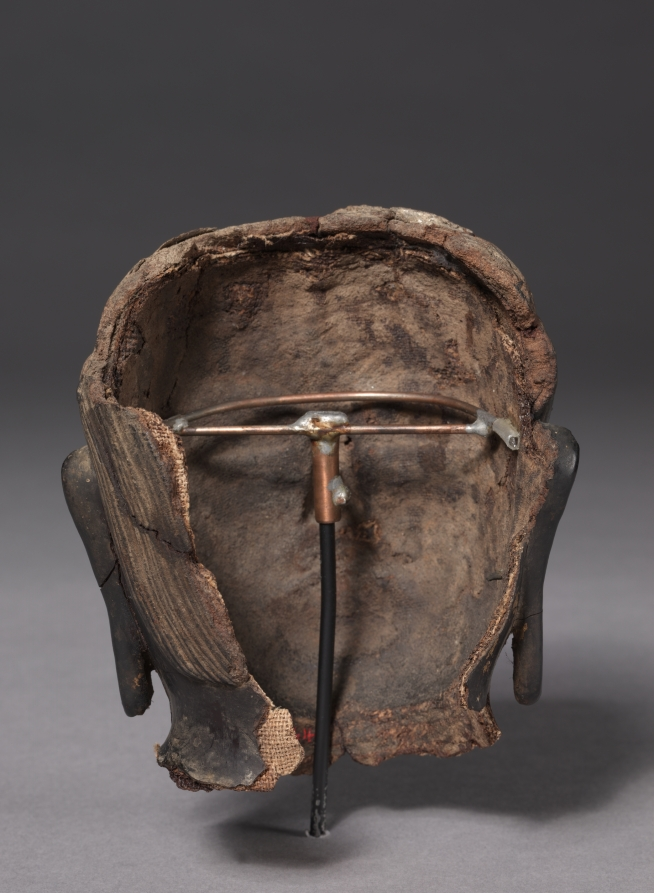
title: Head of Bodhisattva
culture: Japan, Nara period (710–94)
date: 700s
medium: dry lacquer with traces of gilding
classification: Sculpture